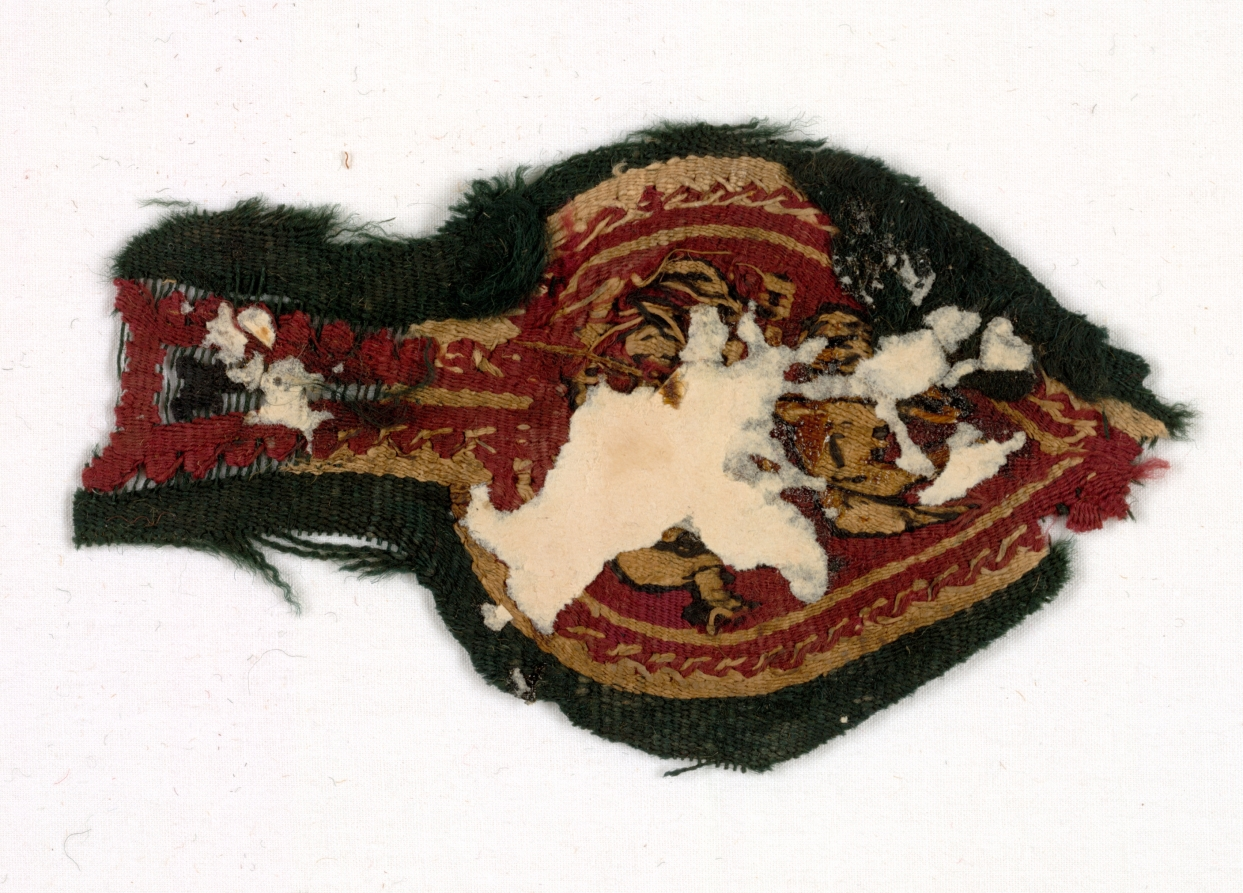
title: Spade-shaped Terminus of a Clavus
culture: Egypt, Byzantine period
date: 400s - 600s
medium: tapestry; linen and wool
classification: Textile